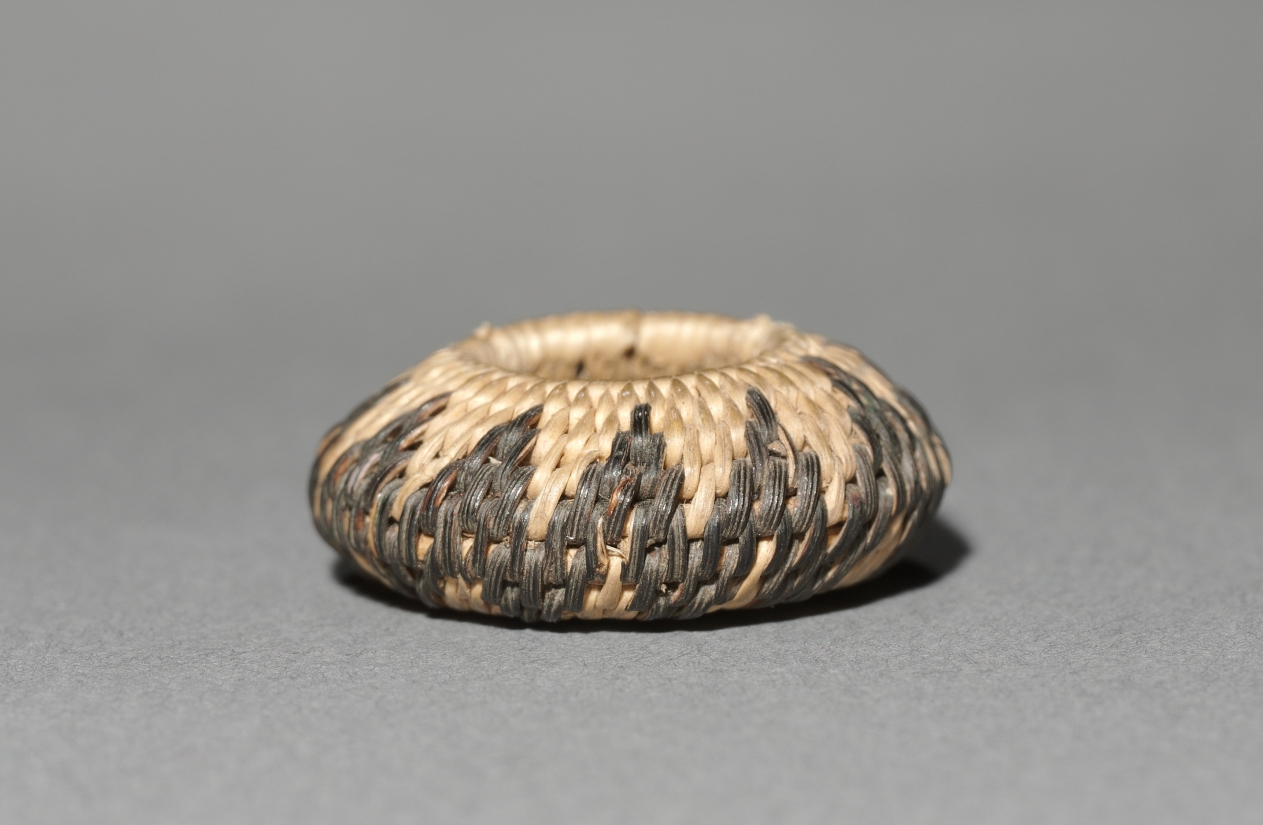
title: Miniature Round Basket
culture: California, Pomo, late 19th-early 20th century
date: late 1800s-early 1900s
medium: plant materials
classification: Basketry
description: Miniature baskets were made to demonstrate the basket-maker’s virtuoso skill, and these tiny marvels seem to be no exception—the smallest are only five millimeters wide but still patterned. For such fine work, dexterity was required as much for preparation of materials as for weaving.